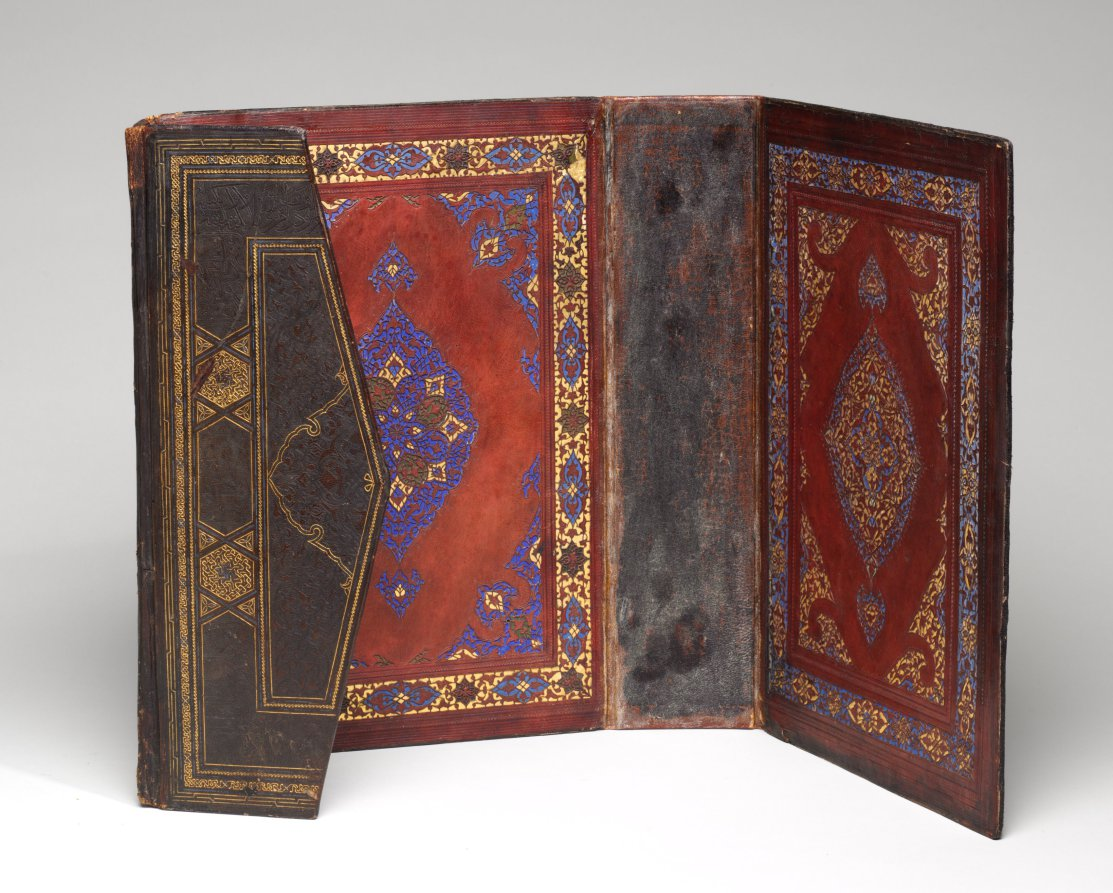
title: Bookbinding for a Qur'an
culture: Turkey, Istanbul, Ottoman period, 15th century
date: 1460–1500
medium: leather over paper pasteboards; outer cover tooled, blue paint; inner covers openwork designs over colored papers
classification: Book Binding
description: Islamic book covers generally have a triangular flap attached to the rear cover of the binding which is tucked under the front cover to protect the outside edge of the pages. The outer covers of this particularly elaborate example feature panels with Qur'anic inscriptions, interlace patterns, and a central medallion filled with floral and arabesque designs. The inner covers offer a superb example of leather openwork, a leather technique that originated in northeastern Iran in the 1400s.